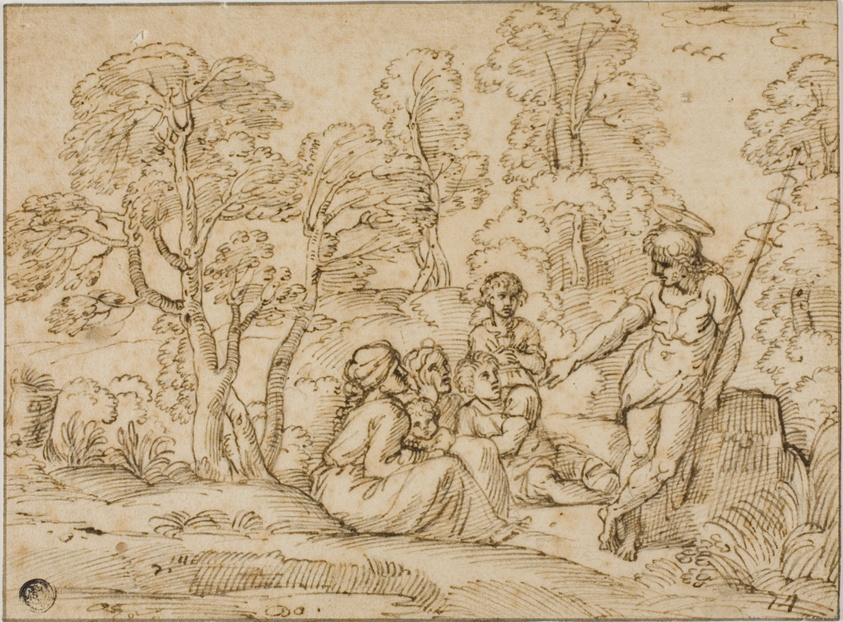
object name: Drawing and Watercolor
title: Saint John the Baptist Preaching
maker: After Annibale Carracci (Italian, 1560-1609); or Giovanni Francesco Grimaldi (Italian, 1606-1680); or Michel Corneille, the Younger (French, 16 01/03-1664)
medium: Pen and brown ink, over black chalk, on tan laid paper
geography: Italy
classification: pen and ink drawings; drawings (visual works); prints and drawing